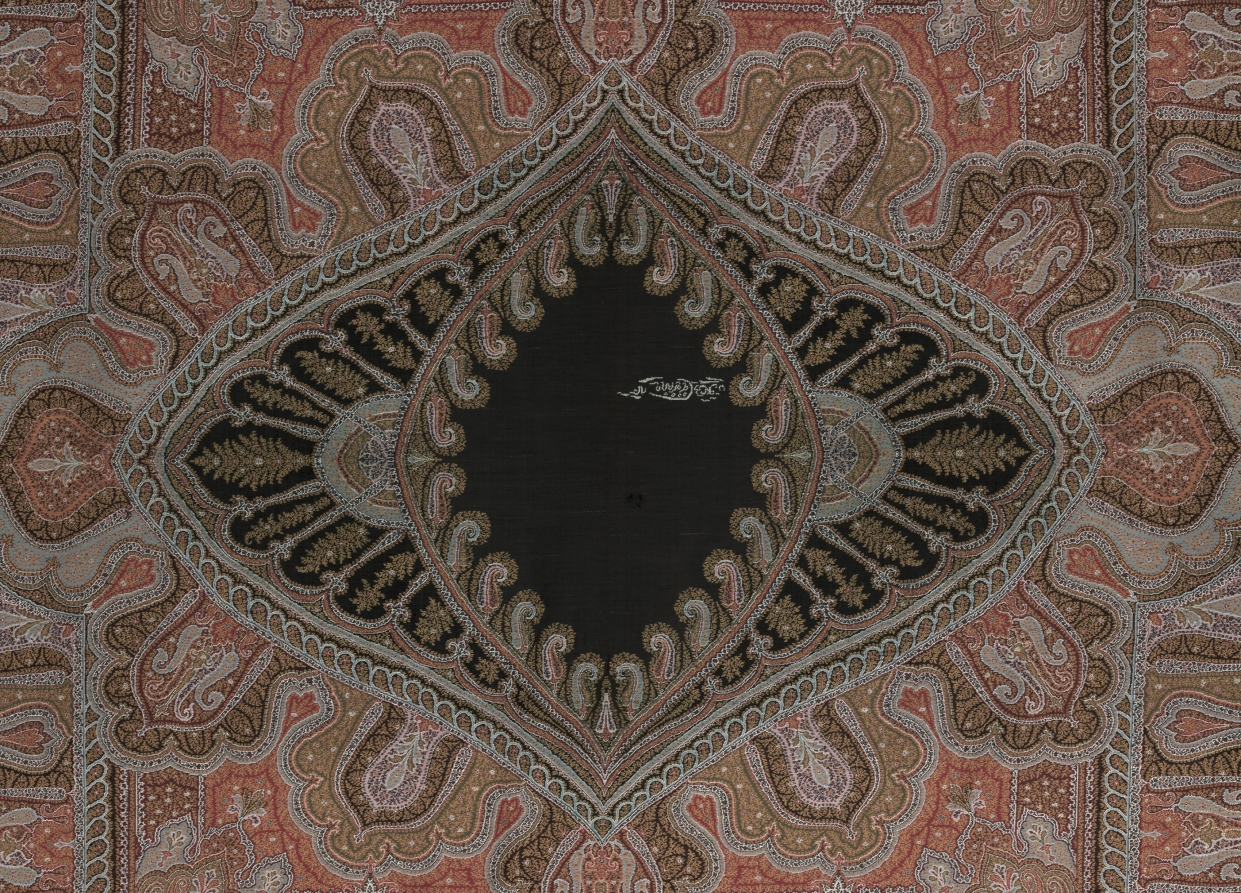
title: Long Shawl with Botehs, Black Center, and Lobed Arcades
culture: France, Paris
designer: Emile Frederic Herbert (French)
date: 1855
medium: supplemental weft pattern; silk?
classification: Textile